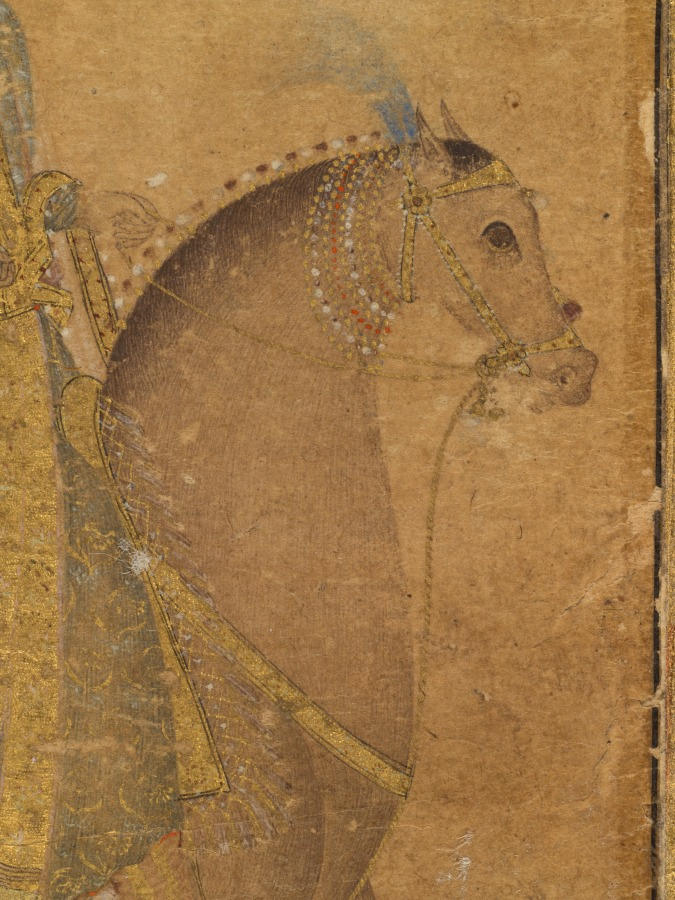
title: Sultan Abdullah Qutb Shah (1614-74) on Horseback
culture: Southern India, Golconda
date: c. 1635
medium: Ink, watercolor, and gold on paper, mounted with gold-sprinkled borders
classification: Painting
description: Sultan Abdullah Qutb Shah came to the throne of Golconda at the age of twelve and ruled until 1635 when the Mughal emperor Shah Jahan invaded the Deccan. Although Sultan Abdullah Qutb Shah kept his position, he did so under conditions named by Shah Jahan that included the payment of tribute money, conversion to Sunni Islam, and the presence of a Mughal political agent at the Golconda court. In this watercolor portrait, executed with subdued colors that complement the gold accents, the young Sultan wears a diaphanous shawl over his richly embroidered robe. His horse is almost as lavishly dressed in decorative trappings and jewels as his rider.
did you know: Specks of gold are sprinkled around the edges of this portrait.